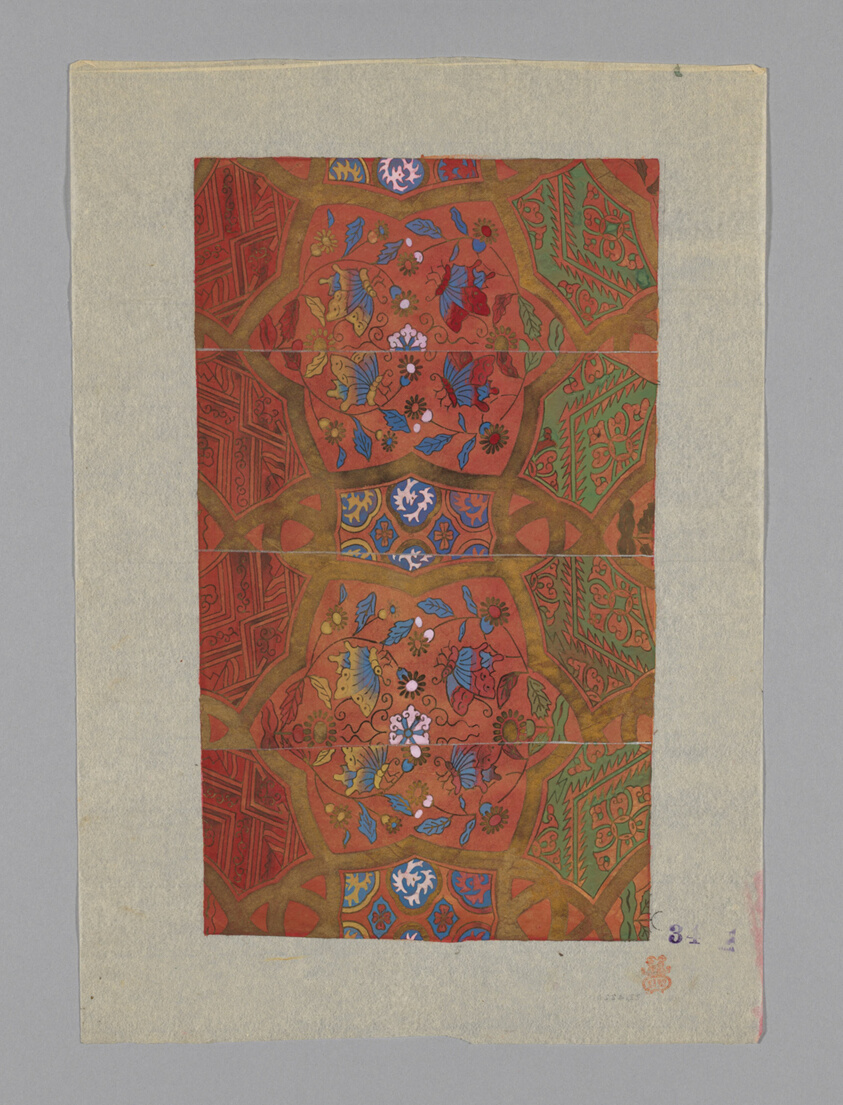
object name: Drawing and Watercolor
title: Design on Paper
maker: Japan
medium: Paper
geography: Japan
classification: textile; accessory - paper design; watercolor; paper